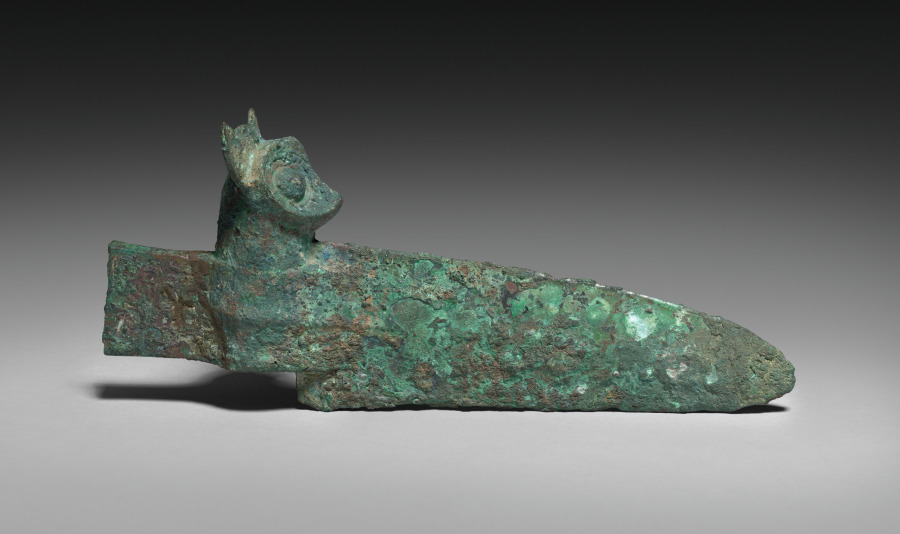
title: Axe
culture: China, Shang dynasty (c. 1600–c. 1046 BCE)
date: 1766–1045 BCE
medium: bronze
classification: Metalwork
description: The head of an owl with large eyes and ears, sitting above the blade of a halberd-axe, may have deterred evil and harm from its carrier. Whether such an axe was used in ritual or warfare is not clear.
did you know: A staff or pike would have attached to the blade via the socket below the owl's head.